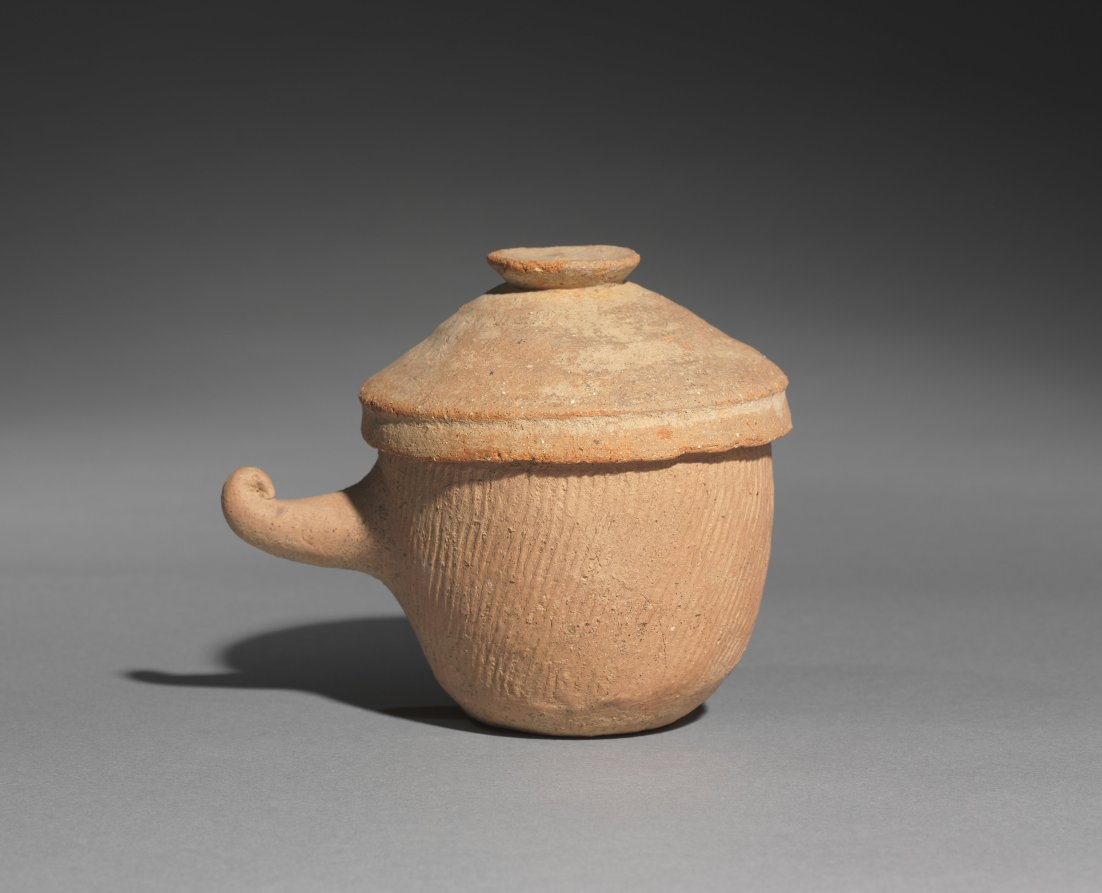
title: Lidded Jar with Horn Handle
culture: Korea, Silla (57 BC-935) or Kaya (AD 42-562) period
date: 400s-500s CE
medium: red earthenware with impressed designs and applied red slip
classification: Ceramic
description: This type of pottery vessel was a product of closed kilns built on hillsides, which became widely used in Korea during the Three Kingdoms period. Its low-fired red surface indicates the various steps in its fabrication. First, coils of clay were layered on top of one another and pinched together to form the wall of the pot. Then wood mallets with carved surfaces pounded these walls simultaneously, inside and out, merging and thinning the clay bands. Thus the impressed designs visible on both the inner and outer surfaces were functional as well as decorative.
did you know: Closed kilns built on hillsides became widely used for producing this type of pottery vessel in Korea during the Three Kingdoms period.